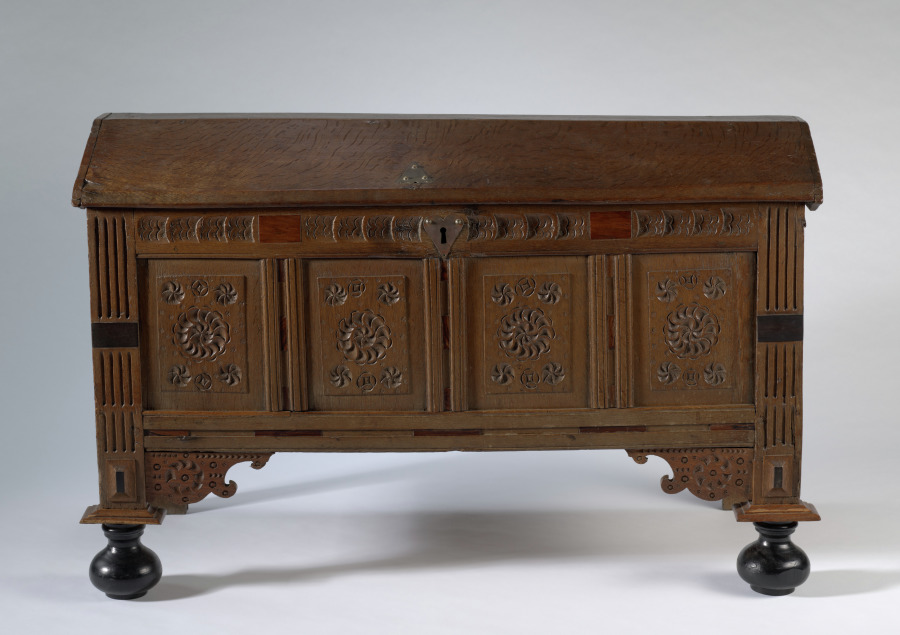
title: Chest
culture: Netherlands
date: 1600s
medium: oak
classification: Furniture and woodwork